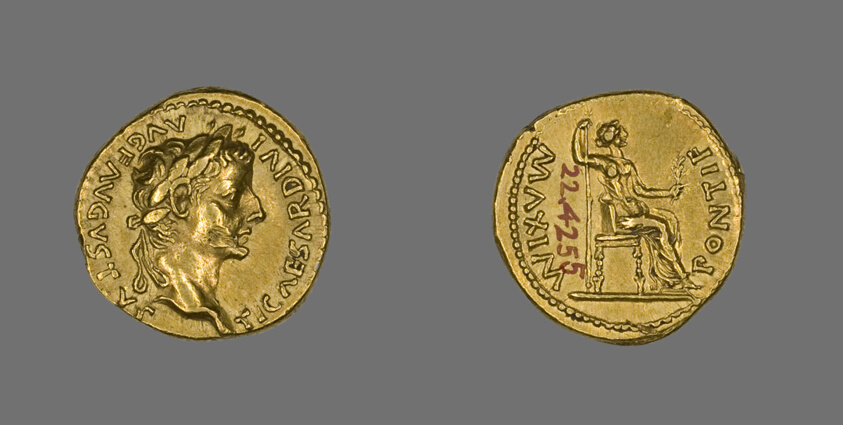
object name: Coin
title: Aureus (Coin) Portraying Emperor Tiberius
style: imperial (roman), ancient, roman (ancient, style or period)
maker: Roman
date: 26-37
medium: Gold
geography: Roman Empire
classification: coin; ancient art